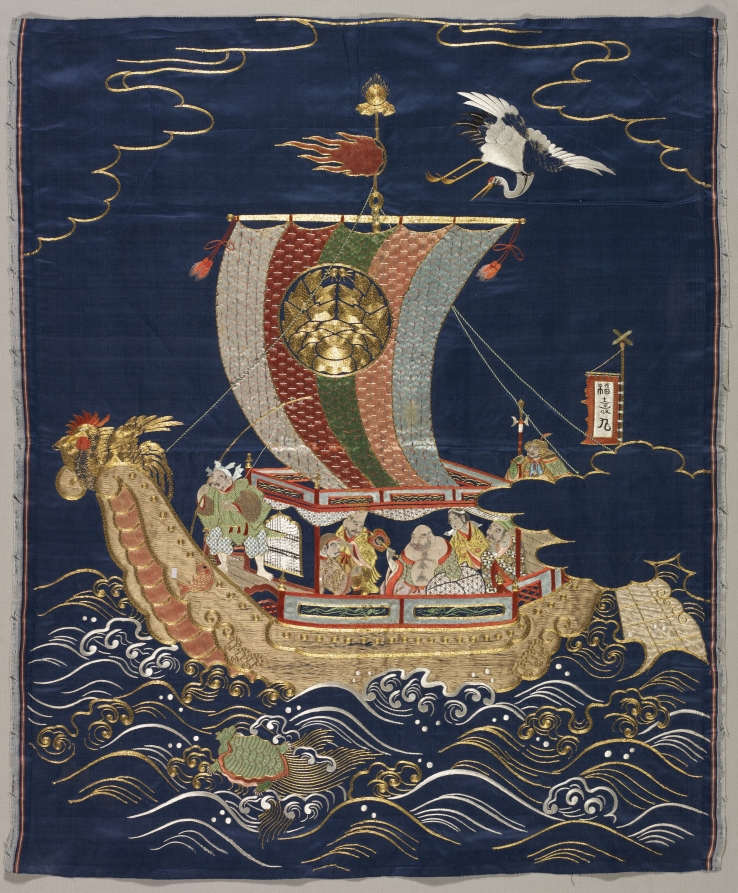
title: Embroidered Fukusa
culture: Japan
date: late 1800s-early 1900s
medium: embroidered silk with metal thread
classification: Embroidery